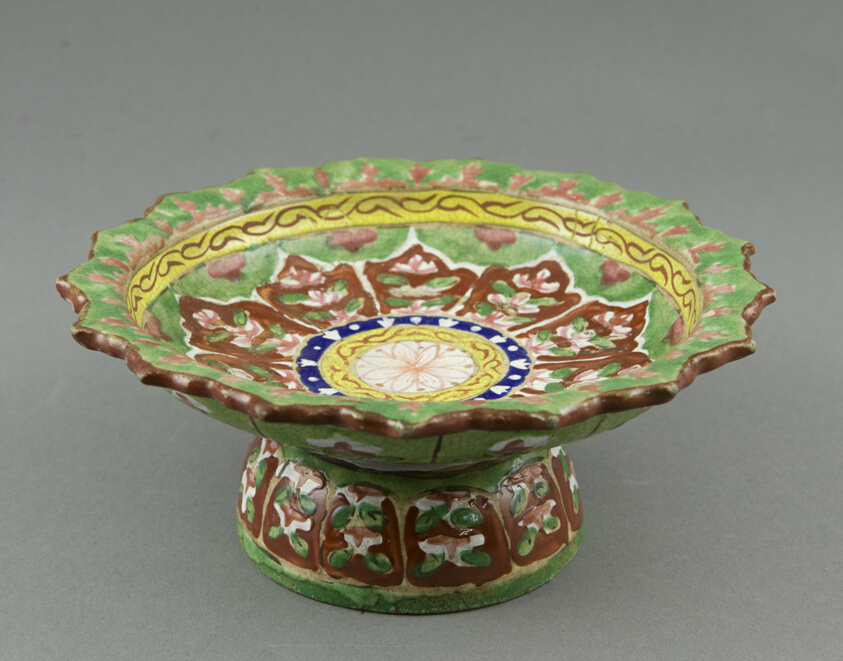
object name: Decorative Arts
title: Bencharong (Five-Colored) Ware, Footed Stem Plate with Foliate Rim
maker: China, for the Thai Market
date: 19th century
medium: Porcelain painted in overglaze polychrome enamels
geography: China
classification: porcelain; asian art; ceramics; decorative arts